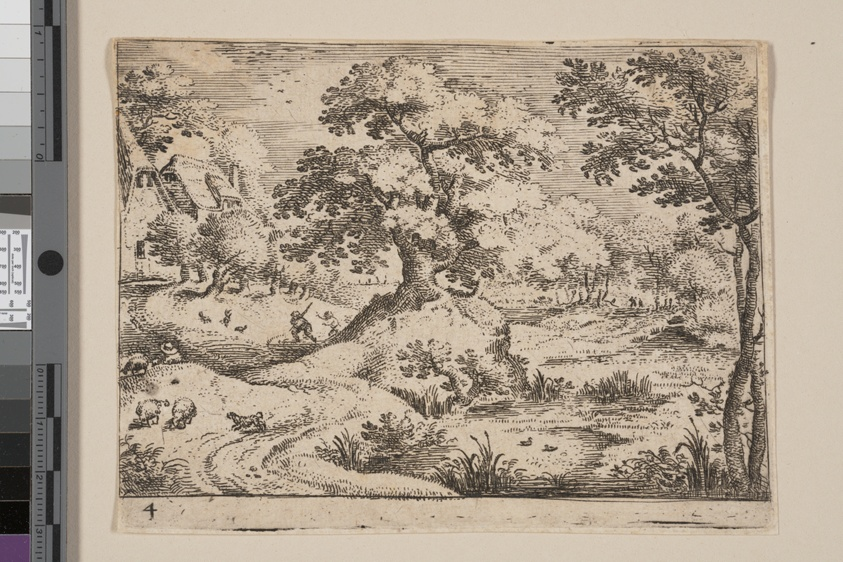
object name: Print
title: Path by a Swamp: Sheepdog and Sheep, from Landscapes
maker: Jacob Savery; Flemish, 1566–1603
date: c. 1595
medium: Etching on ivory laid paper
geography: Flanders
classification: etching; paper; print; prints and drawing